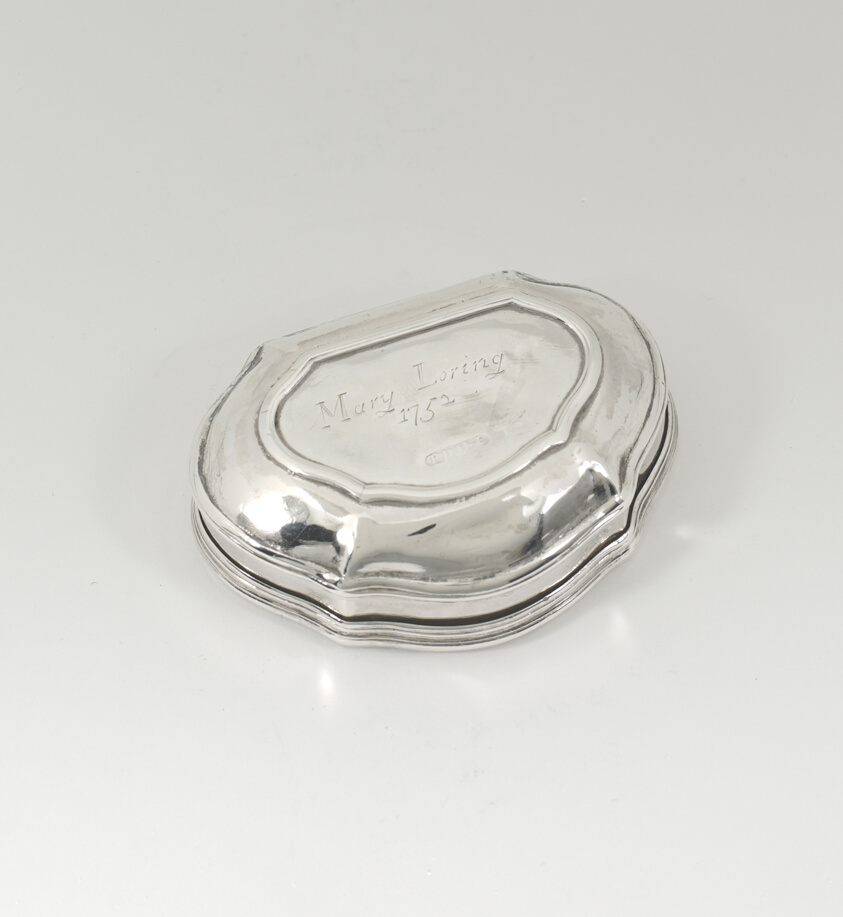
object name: Metalwork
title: Snuff Box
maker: Thomas Dane; American, 1726–1759; Boston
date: 1752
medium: Silver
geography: Boston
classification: container; snuff box; box; silver; american decorative arts; american arts; decorative arts